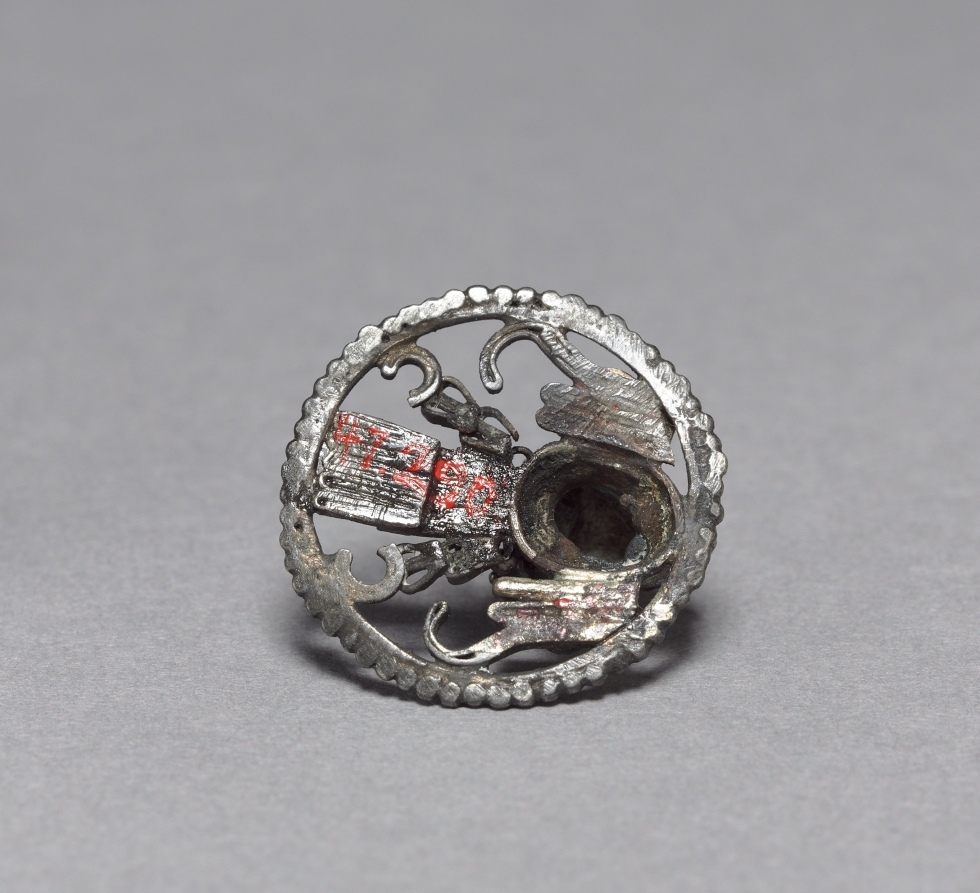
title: Eagle Ornament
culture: Mexican, Oaxaca, Mixtec style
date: c. 1200–1519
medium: silver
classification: Metalwork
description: An additional ornament probably once dangled from the eagle's beak. Similar jewelry has been found in high status Mixtec tombs at Zaachila and at Monte Albán, a Zapotec site controlled by the Mixtec after about AD 750.